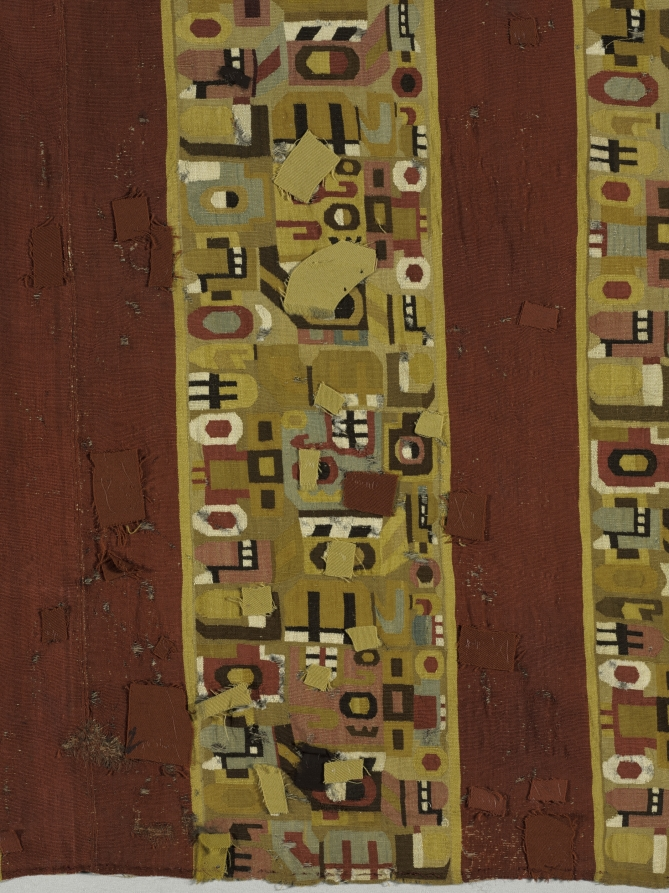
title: Tunic with Sacrificer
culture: South America, Peru, Central Andes, Middle Horizon, Wari people, 7th-11th century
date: 600–1000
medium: camelid-fiber, cotton; tapestry weave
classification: Textile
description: An extremely abstract supernatural sacrifice repeats in different colors and orientations across the body of this tunic, which was shortened on one side in antiquity. Look for the toothy black-and-white mouth in the sacrificer's upward-gazing head; other facial features include a button nose and a vertically divided eye. The figure holds the L-shaped haft of an axe behind its back and, at the front of its body, a short staff with a severed, upside-down human head on the top.